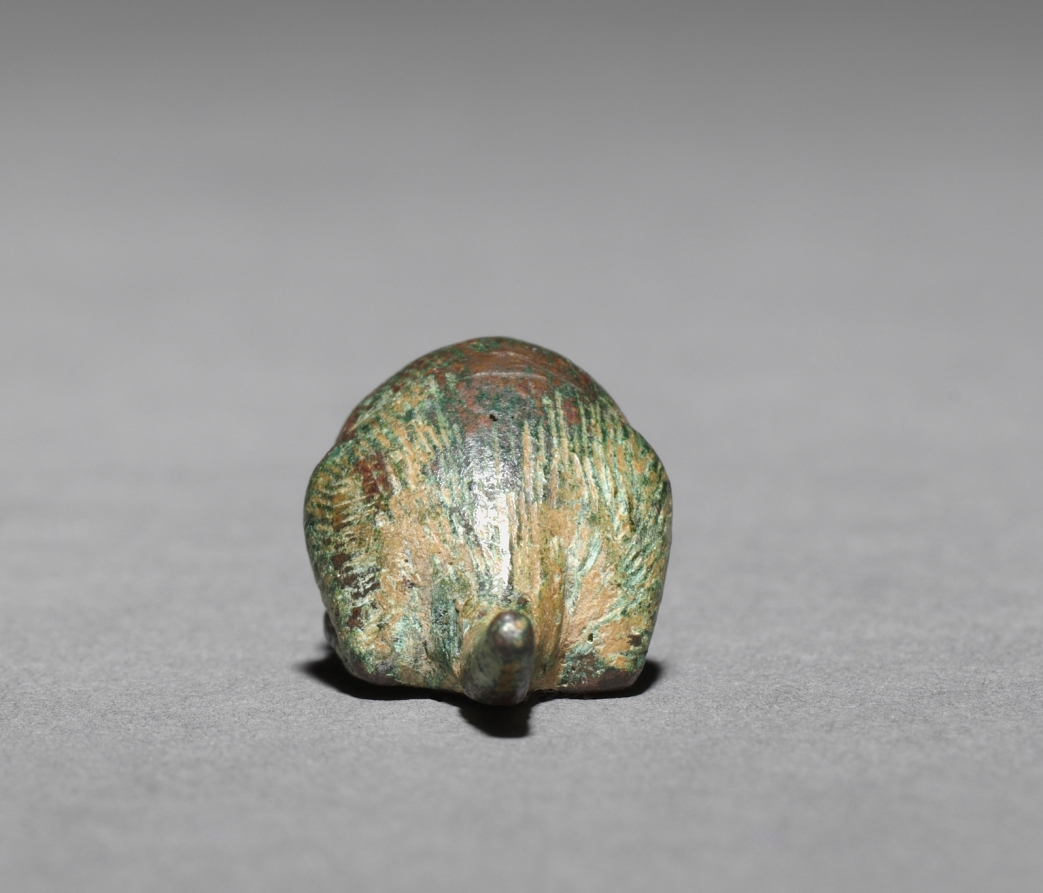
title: Mouse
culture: Italy, Rome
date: 1–200 CE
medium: bronze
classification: Sculpture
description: The Romans were the first people in antiquity to make large numbers of genre sculptures for no purpose other than household decoration. This mouse may have been just such a knick-knack or it may have ornamented a metal food container laying claim to its contents so that other mice would stay away.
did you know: Small mouse figurines were often affixed to oil lamps to ward off living mice that might eat the wicks or lamp oil